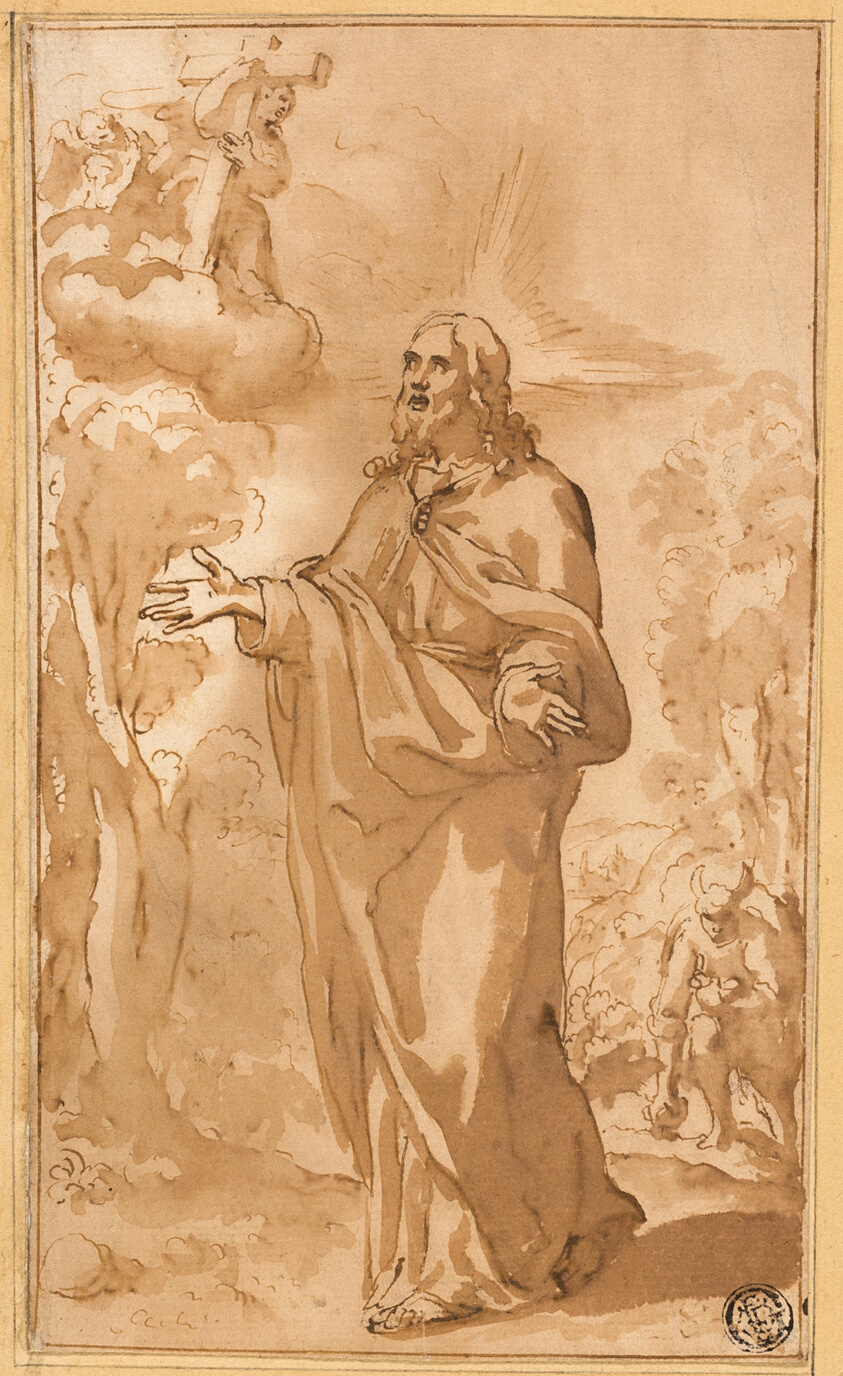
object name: Drawing and Watercolor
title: Christ in the Wilderness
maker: Juan del Castillo (Spanish, 1584-1640); or Bartolomé Esteban Murillo (Spanish, 1618-1682)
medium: Pen and brown ink and brush and brown wash, with touches of black chalk, on ivory laid paper, laid down on cream laid card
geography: Spain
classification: ink or chalk wash; drawings (visual works); prints and drawing